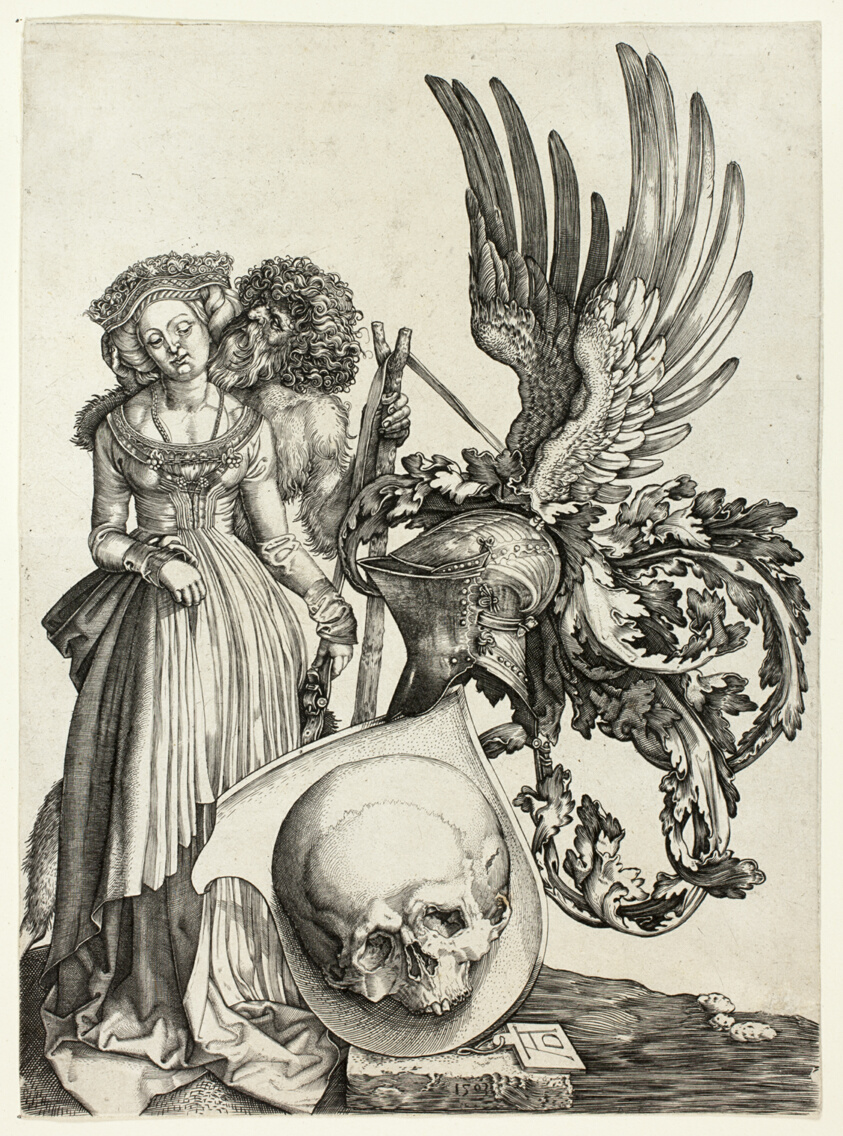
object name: Print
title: Coat of Arms with a Skull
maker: Jan Wierix (Flemish, 1549-c. 1620); after Albrecht Dürer (German, 1471-1528)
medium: Engraving in black on ivory laid paper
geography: Flanders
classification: engraving; print; prints and drawing